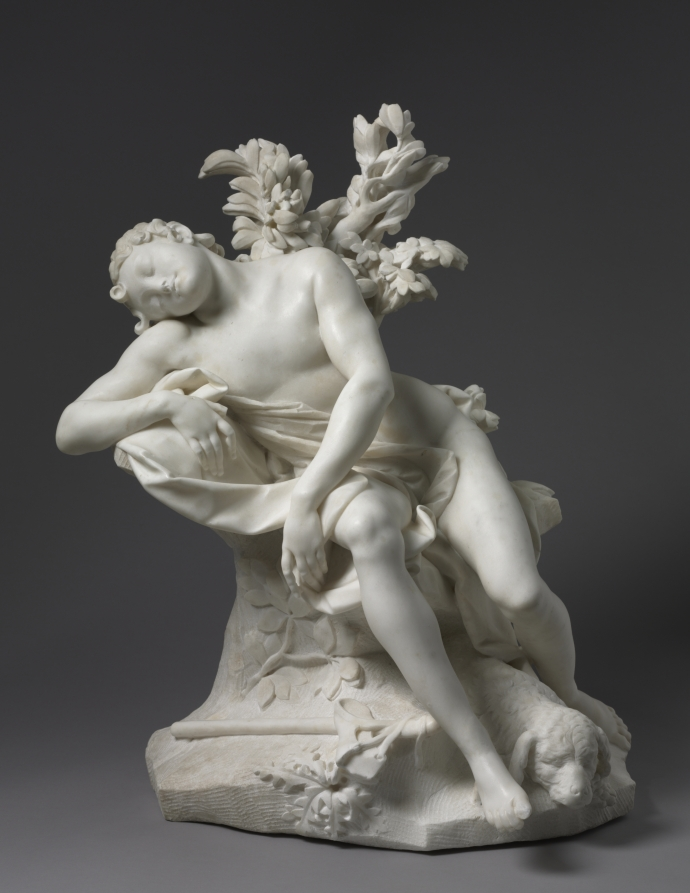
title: Sleeping Endymion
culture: Italy, 18th century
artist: Agostino Cornacchini (Italian, 1686–1754)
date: 1716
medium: marble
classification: Sculpture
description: Cornacchini moved away from the dramatic movement and light effects characteristic of baroque sculpture toward a calmer, gentler, more graceful style favored by 18th-century taste. This sculpture depicts Endymion, a beautiful young shepherd from Greek mythology. His beauty so entranced Selene, the personification of the moon, that she asked Zeus to grant Endymion immortality. Zeus did so, but only after placing Endymion in an eternal sleep.